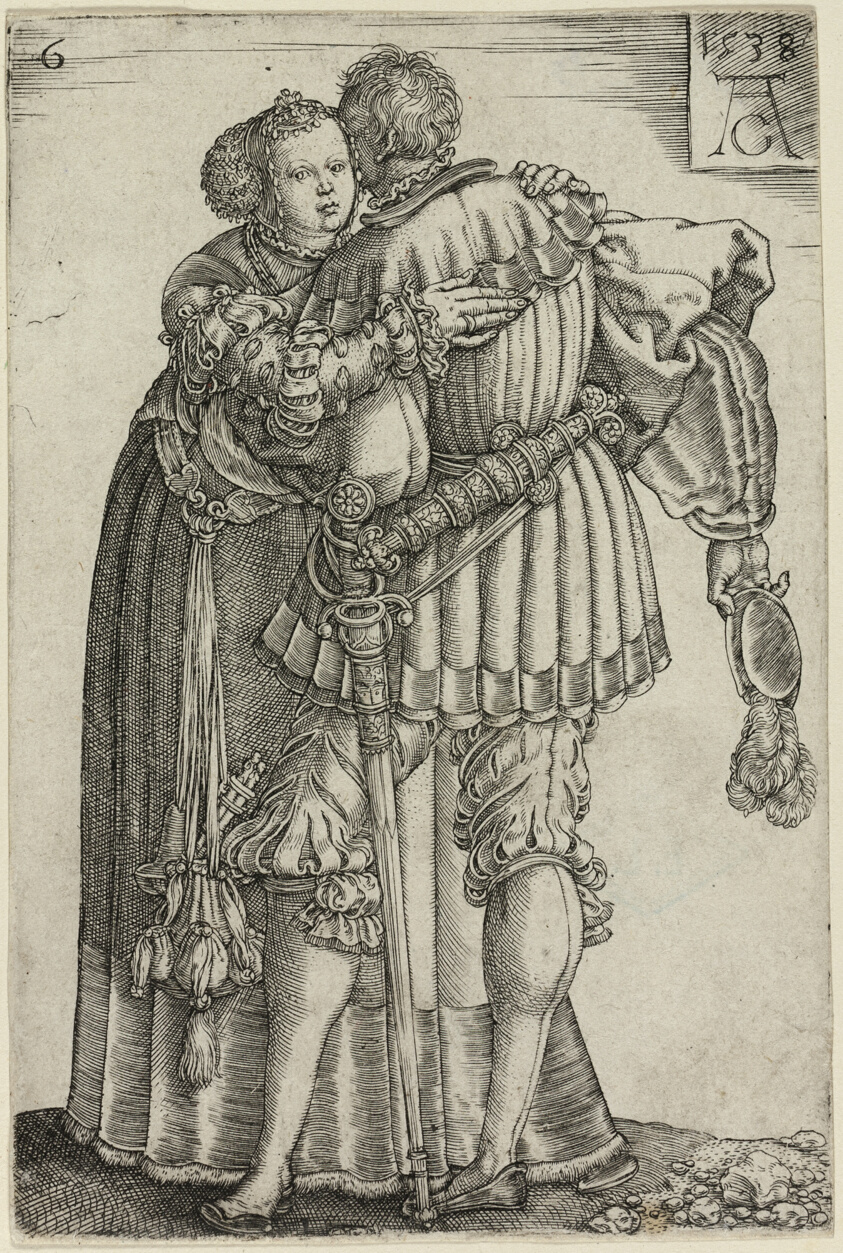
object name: Print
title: Couple Embracing, plate six from The Large Wedding-Dancers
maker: Heinrich Aldegrever (German, 1502-c.1560)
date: 1538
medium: Engraving in black on ivory laid paper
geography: Germany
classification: engraving; print; prints and drawing